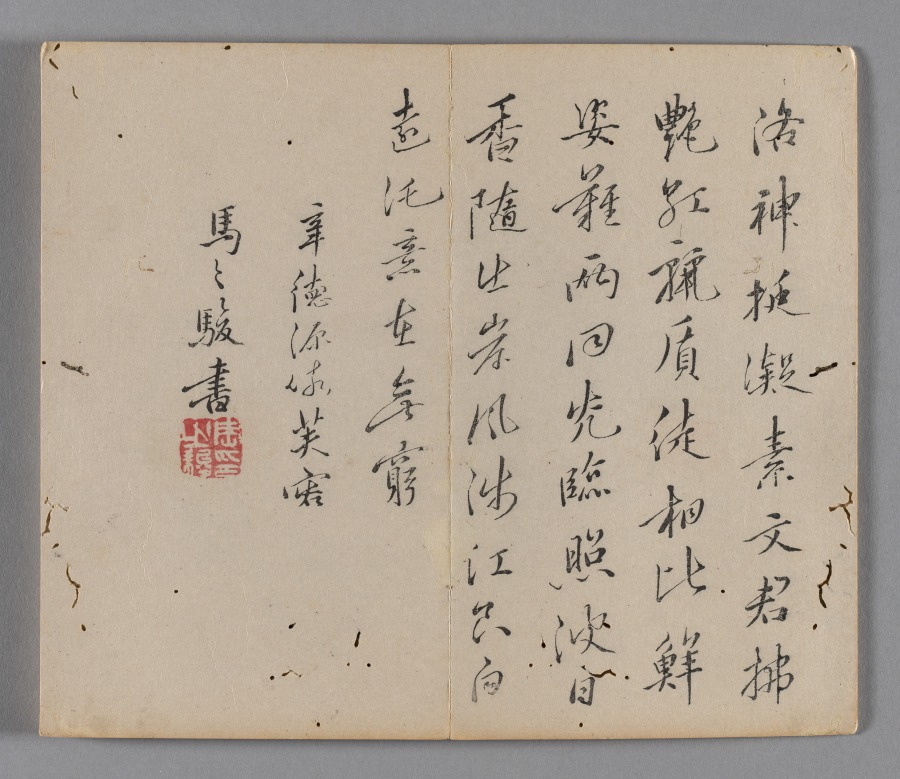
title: Ten Bamboo Studio Collection of Calligraphy and Painting: Miscellaneous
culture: China, Qing dynasty (1644-1911)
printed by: Hu Zhengyan (Chinese, c. 1584–1674)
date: 1633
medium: Woodblock-printed book; ink and colors on paper; first edition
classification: Print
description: Color printing reached a level of perfection in the early 1600s, as seen in this Ten Bamboo Studio Collection of Calligraphy and Painting and the Mustard Seed Garden Manual of Painting (printed 1679 and 1701). The painterly quality, precision in registering (aligning) the woodblocks, and harmonious colors made them the most successful color print editions in Chinese history. Both editions were printed and compiled in Nanjing, spread nationwide, and had a great impact on the arts in Japan and Korea.